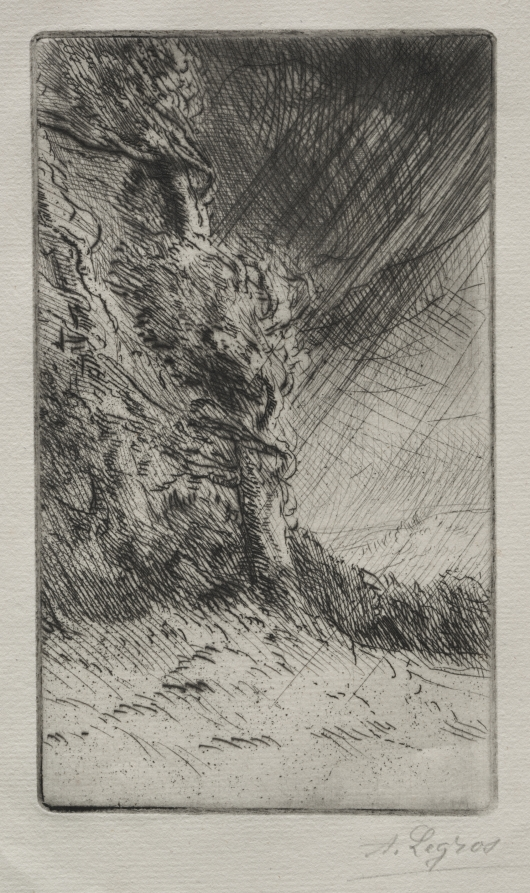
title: A Gust of Wind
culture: France, 19th century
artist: Alphonse Legros (French, 1837–1911)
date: c. 1857–1911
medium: drypoint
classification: Print